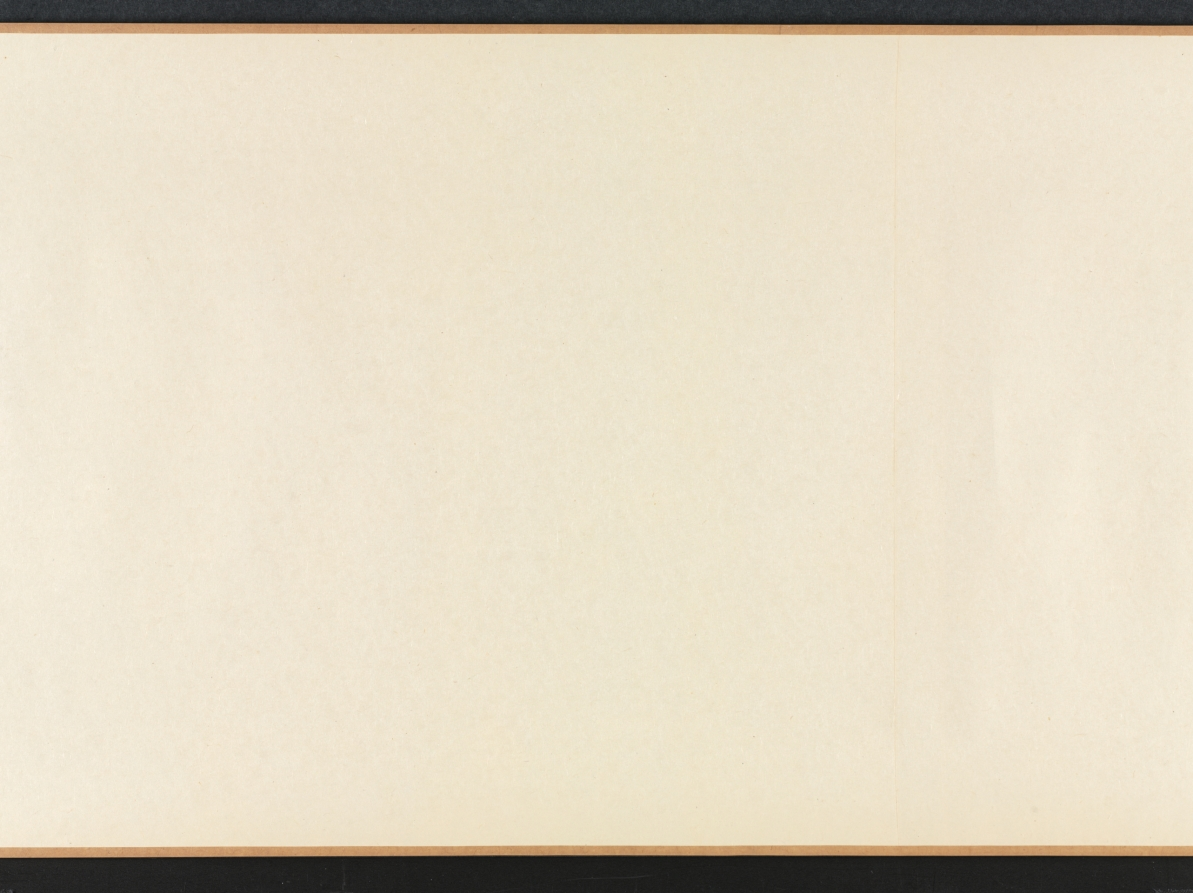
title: Hall of Lofty Pines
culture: China, Qing dynasty (1644-1911)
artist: Wang Hui (Chinese, 1632–1717)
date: 1703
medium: handscroll; ink and color on paper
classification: Painting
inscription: [題] 松喬堂圖 康熙癸未夏六月, 海虞耕煙散人王翬畫。[印]王翬之印; 石谷. [左下] 來青閣; 耕煙野老時年七十有二.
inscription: 松喬堂圖一卷，海虞石谷王君為靜海近公厲少司冦公作也。圖成于癸未之夏。未幾而公遂仙去。公令子今編修君南湖屬余題跋其後。余與公同官侍從，交契最深。側見公之清修純德，蔚為聖天子所眷重。侍直內廷，密勿贊襄，幾二十餘年。蒼生之所以受賜，士林之所以沐德者，天下莫能窺，在廷莫能悉。而公卒不言。以故宸衷日益契，恩禮亦日益渥。雖年逾懸車，時有歸老之念。而上固不聼公之去。其所謂松喬堂者，御書以賜公者也。蓋以松比公之清風勁節，而歲寒不改，經霜彌茂。則又以期公之壽考未有艾焉。公知此身未易乞，而山林槃磵之樂，止可寄諸寤思。此松喬堂圖之所由作也歟。石谷此圖，結構精密，筆墨超邁。其寫樹木之蒼蔚，堂宇之靚幽。恍見摩詰輞川樂天廬山之勝。獨惜公未得一日徜徉故園以償其願。即繪於圖亦未得以永其趣，此編修君之所以眷眷不忘也。雖然千歳之松喬，下蔭百畝，上以修棟梁之需。然則上當日名堂之意，不更望於後之人襲其芘而養其材也哉。吾願編修君之寶斯圖。并望君之塗塈丹雘，大其堂構也已矣。 康熈丙戍重陽三日，雲間王鴻緒跋。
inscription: 10 additional seals: 1 seal of Li Duna 勵杜納 (1628–1703); 4 seals of Zha Ying 查瑩 (jinshi of 1766); 5 seals of Li Yun (dates unknown).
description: Wang Hui 王翬, a leading painter in the orthodox school of the early Qing dynasty (1644–1911), was commissioned to paint this landscape with a country estate for Li Duna 勵杜納 (1628–1703), vice minister of justice in Emperor Kangxi’s court. The emperor had honored Li by granting him a piece of calligraphy with the name of Li’s retirement retreat, “Hall of Lofty Pines.” He drew a comparison between pines and Li’s upright character, resilience, and longevity. Wang Hui’s painting was supposed to allow Li to imagine living in a beautiful, secluded compound among the hills and pines. Sadly, Li died before seeing the completed painting and before receiving the emperor’s permission to retire. The landscape begins with peaceful riverbanks and low hills. The pines around the estate in the middle of the handscroll are truly lofty, some stretching even beyond the frame of the painting. Li Duna, the estate’s owner, is shown twice in his serene mountain retreat: first approaching the entrance to the compound with two servants at the right, and then later in the scroll, to the left, reading in the comfort of an inner room.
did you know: One servant carries the estate owner's carefully wrapped qin, a type of zither.